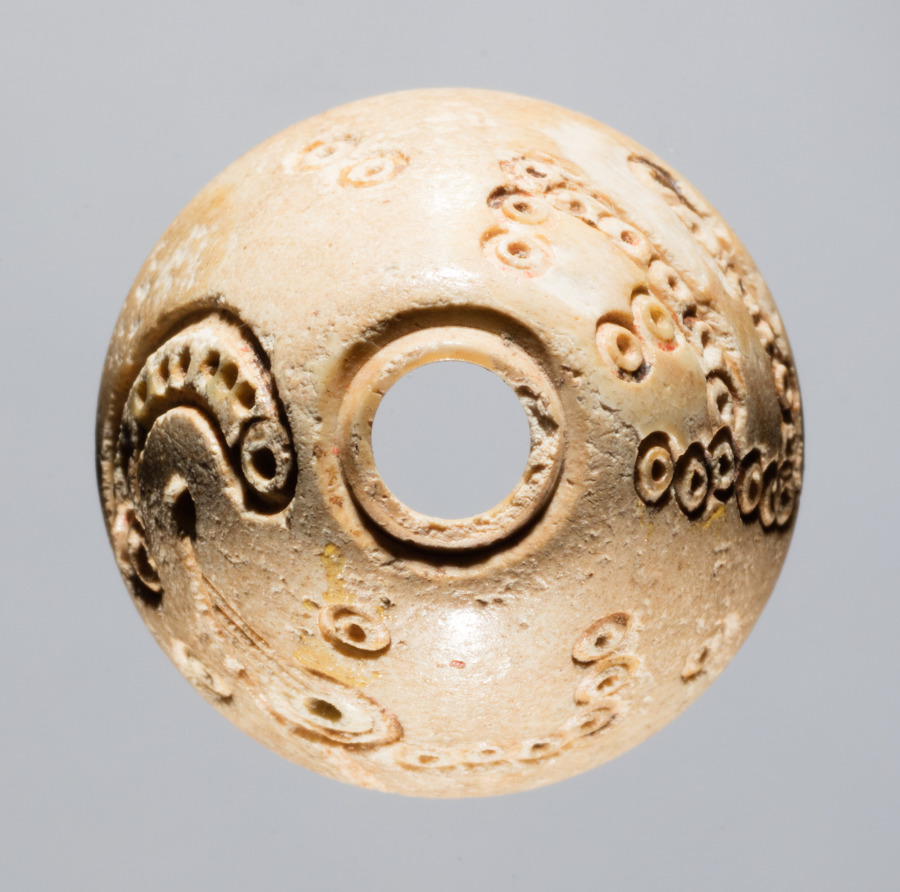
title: Spindle Whorl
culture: Iran, early Islamic period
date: 700s - 900s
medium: bone, incised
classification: Spindle Whorl